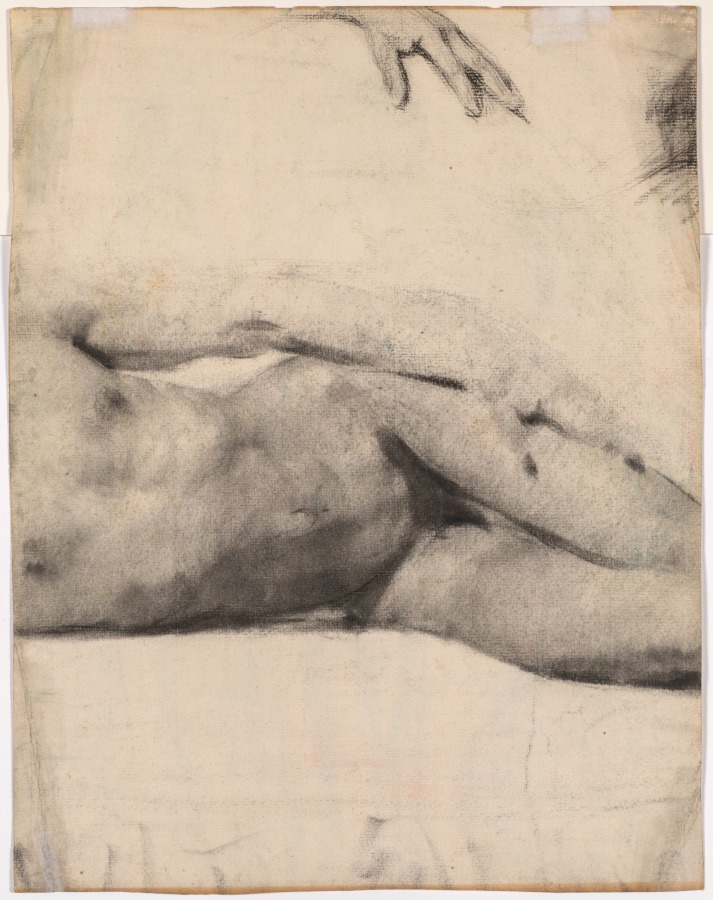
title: Reclining Male Nude (verso)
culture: France, 19th century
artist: Edouard Vuillard (French, 1868–1940)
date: c. 1887–89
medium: Black chalk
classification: Drawing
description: During the early 1890s, Édouard Vuillard repeatedly represented his mother and older sister, Marie, in domestic settings. This drawing relates to a pastel and painting, all of which show Marie standing before a mirror, raising her arms as if to adjust her hairstyle. A charcoal study of a nude male appears on the verso, suggesting that the artist may have reused the sheet.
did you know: Vuillard probably created this drawing while he was a student at Paris's Académie Julian, where he met the other artists who would become the Nabis.